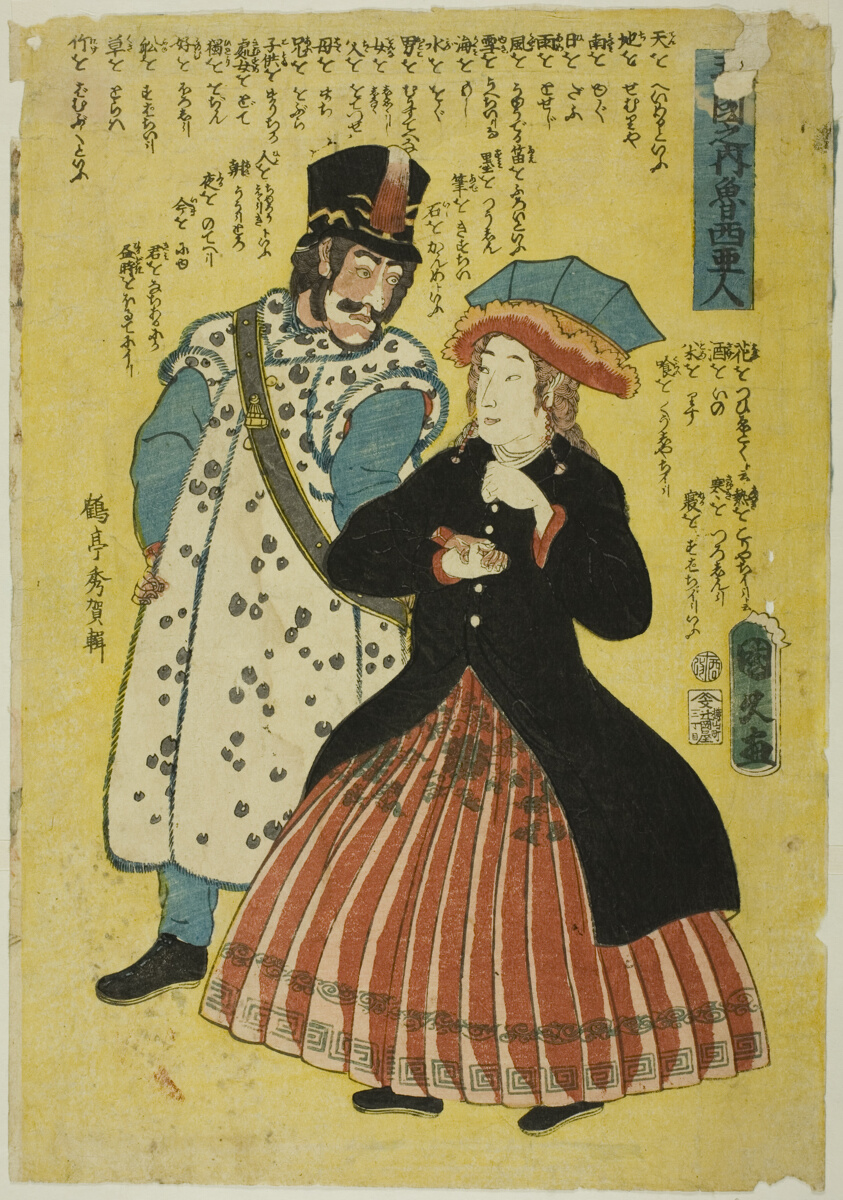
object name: Print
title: Russians (Roshiajin), from the series "People of the Five Nations (Gokakoku no uchi)"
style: Japanese (culture or style)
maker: Utagawa Kunihisa II (Japanese, 1832–1891)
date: 1861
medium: Color woodblock print; oban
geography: Japan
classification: woodblock print; print; asian art